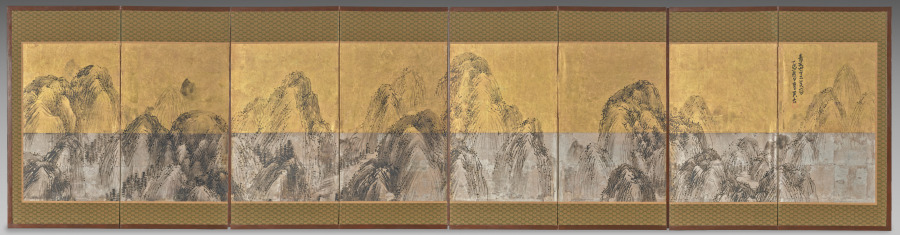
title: Seventy-Two Peaks Under the Blue Sky with Mount Furong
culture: Japan, Edo period (1615–1868)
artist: Matsumura Goshun (Japanese, 1752–1811)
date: 1785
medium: Eight-panel folding screen; ink with gold and silver foil on paper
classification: Painting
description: The low height of this folding screen suggests its use as a partition in a small tearoom. An inscription identifies the scene as the 72-peak Heng mountain range in Hunan, China, associated with Buddhist and Daoist traditions and celebrated in poetry. Special mention in the inscription is made of Mount Furong, one of the peaks in the range. Matsumura Goshun may have drawn inspiration from his teacher, Yosa Buson (与謝蕪村) (1716–1783), whose final work depicted the same mountain range.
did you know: By painting on silver and gold foil, Matsumura Goshun created an alluring surface and deep space in this surprisingly spare vista.